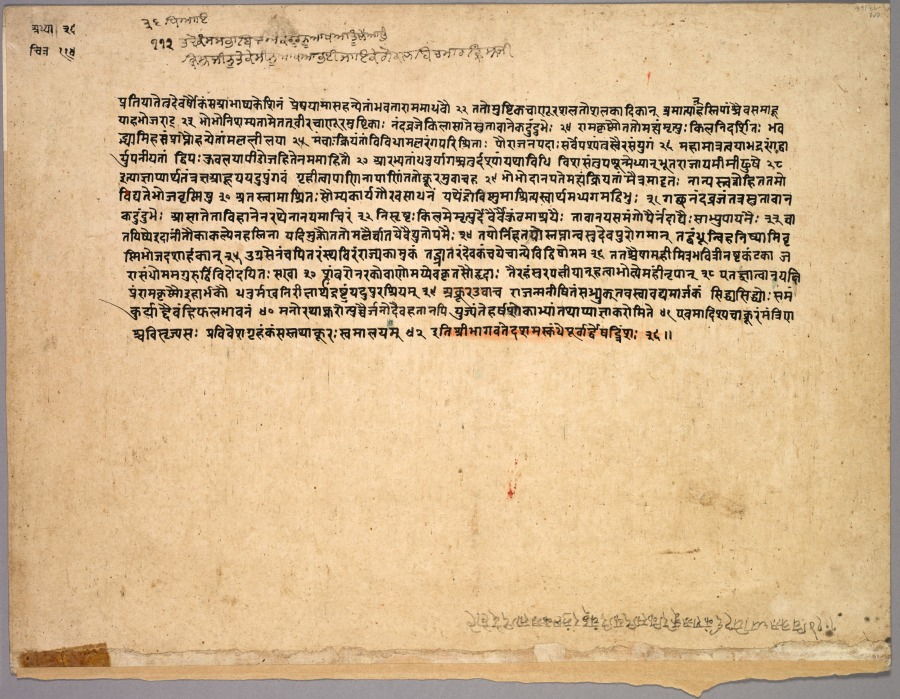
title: Kamsa deploys Akrura and Keshi to Braj, from a Bhagavata Purana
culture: Northern India, Pahari kingdoms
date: c. 1830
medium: Gum tempera, ink, and gold on paper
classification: Painting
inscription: [[recto, in Nagari]] 36. sabhā vica sthīta ho sadī denyā caṁdura muṣtika akrūre ke sadi kari ajnā diṁde hoā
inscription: [[verso, in Gurmukhi]] 36. dhiāi. 112. ‘tade kaṁsa sabhā bica akarura nū ākhaā tūṁ lai aaū krisna jī nū te kesī nū ākhaā bhaī jāike gokala bica māra krisna ji.’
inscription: [[verso, in Sanskrit]] pratiyāte tu devarṣau kaṁsa ābhāṣya keśinam preṣayām āsa hanyetāṁ bhavatā rāma mādhavau. 22. tato muṣṭika cāṇūra śala tośalakādikān amātyān hastipāṁś caiva samāhūyāha bhoja-rāṭ. 23. bho bho niśamyatām etad vīra cāṇūra muṣṭikau nanda vraje kilāsāte sutāv ānakadundubheḥ. 24. rāma-kṛṣṇau tato mahyaṁ mṛtyuḥ kila nidarśitaḥ bhavadbhyām iha samprāptau hanyetāṁ malla-līlayā. 25. mañcāḥ kriyantāṁ vividhā malla raṅga-pariśritāḥ paurā jānapadāḥ sarve paśyantu svaira-saṁyugam. 26. mahāmātra tvayā Bhadra raṅga-dvāry upanīyatām dvipaḥ kuvalayāpīḍo jahi tena mamāhitau 27. ārabhyatāṁ dhanur-yāgaś caturdaśyāṁ yathā-vidhi viśasantu paśūn medhyān bhūta-rājāya mīḍhuṣe jahi tena mamāhitau. 28. ity ājñāpyārtha-tantra-jña āhūya yadu-puṅgavam gṛhītvā pāṇinā pāṇiṁ tato ’krūram uvāca ha. 29. bho bho dāna-pate mahyaṁ kriyatāṁ maitram ādṛtaḥ nānyas tvatto hitatamo. vidyate bhoja-vṛṣṇiṣu. 30. atas tvām āśritaḥ saumya kārya-gaurava-sādhanam yathendro viṣṇum āśritya svārtham adhyagamad vibhuḥ vidyate bhoja-vṛṣṇiṣu. 31. gaccha nanda-vrajaṁ tatra sutāv ānakadundubheḥ āsāte tāv ihānena rathenānaya mā ciram. 32. nisṛṣṭaḥ kila me mṛtyur devair vaikuṇṭha-saṁśrayaiḥ tāv ānaya samaṁ gopair nandādyaiḥ sābhyupāyanaiḥ. 33. ghātayiṣya ihānītau kāla-kalpena hastinā yadi muktau tato mallair ghātaye vaidyutopamaiḥ. 34. tayor nihatayos taptān vasudeva-purogamān tad-bandhūn nihaniṣyāmi vṛṣṇi-bhoja-daśārhakān. 35. ugrasenaṁ ca pitaraṁ sthaviraṁ rājya-kāmukaṁ tad-bhrātaraṁ devakaṁ ca ye cānye vidviṣo mama. 36. tataś caiṣā mahī mitra bhavitrī naṣṭa-kaṇṭakā jarāsandho mama gurur dvivido dayitaḥ sakhā. 37. śambaro narako bāṇo mayy eva kṛta-sauhṛdāḥ tair ahaṁ sura-pakṣīyān hatvā bhokṣye mahīṁ nṛpān. 38. etaj jñātvānaya kṣipraṁ rāma-kṛṣṇāv ihārbhakau dhanur-makha-nirīkṣārthaṁ draṣṭuṁ yadu-pura-śriyam. 39. śrī-akrūra uvāca rājan manīṣitaṁ sadhryak tava svāvadya-mārjanam siddhy-asiddhyoḥ samaṁ kuryād daivaṁ hi phala-sādhanam. 40. manorathān karoty uccair jano daiva-hatān api yujyate harṣa-śokābhyāṁ tathāpy ājñāṁ karomi te. 41. evam ādiśya cākrūraṁ mantriṇaś ca viṣṛjya saḥ praviveśa gṛhaṁ kaṁsas tathākrūraḥ svam ālayam. 42. iti śrī bhāgavate daśama skaṁde pūrvārdhe ṣanḍiśaḥ 36.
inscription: [[verso, in Nagari]] adhyā[ya] 36 citra 114. 114 citra adhyāye 36 kaṁśa akrūre ki sadi kari chandūr muṣtika ājnā diṁde hoe.